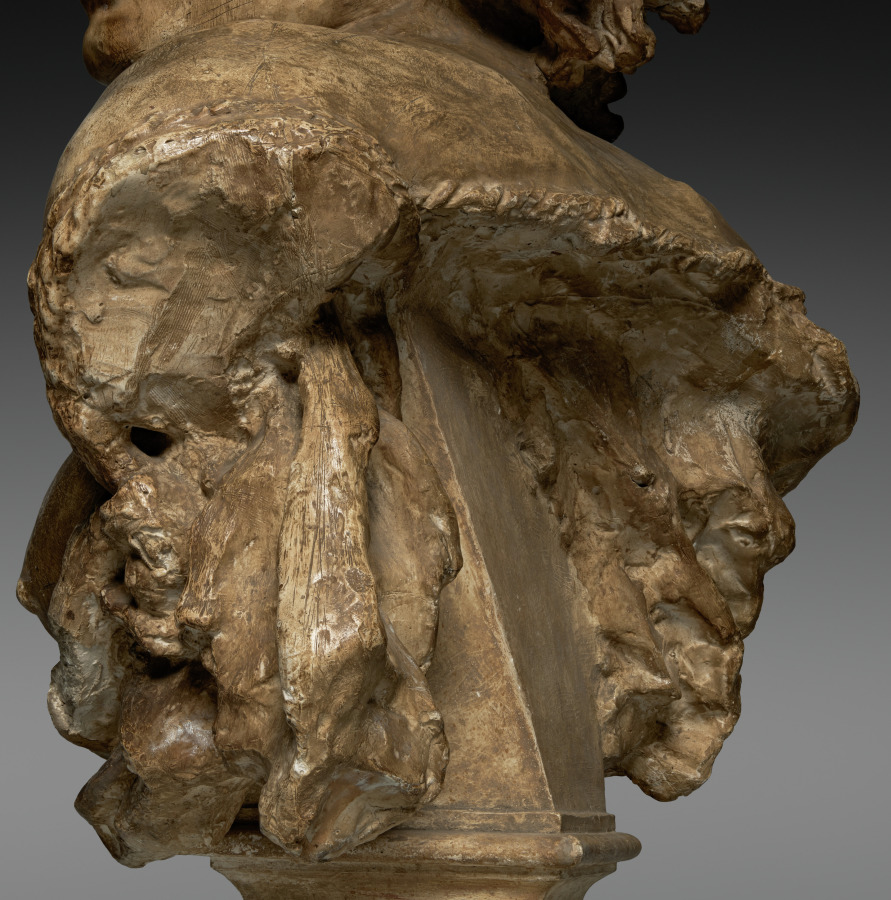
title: Why Born Enslaved!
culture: France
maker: Jean-Baptiste Carpeaux (French, 1827–1875)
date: 1867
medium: Plaster, original polychromed surface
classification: Sculpture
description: One of the most powerful expressions of abolitionist sentiment in the visual arts, Why Born Enslaved! depicts an African woman bound by ropes and looking defiantly upward. The ropes press painfully into her breasts; her torn blouse alludes to the violence responsible for her condition. The original, polychromed surface is covered with complex, nuanced hatchings and subtle modeling. Evidence indicates that this masterpiece of 19th-century French sculpture served as the master model for numerous casts in other museum collections.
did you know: Although officially abolished in France since 1848, slavery remained a hotly contested issue in Carpeaux’s time as it remained legal or tolerated in various countries around the world.